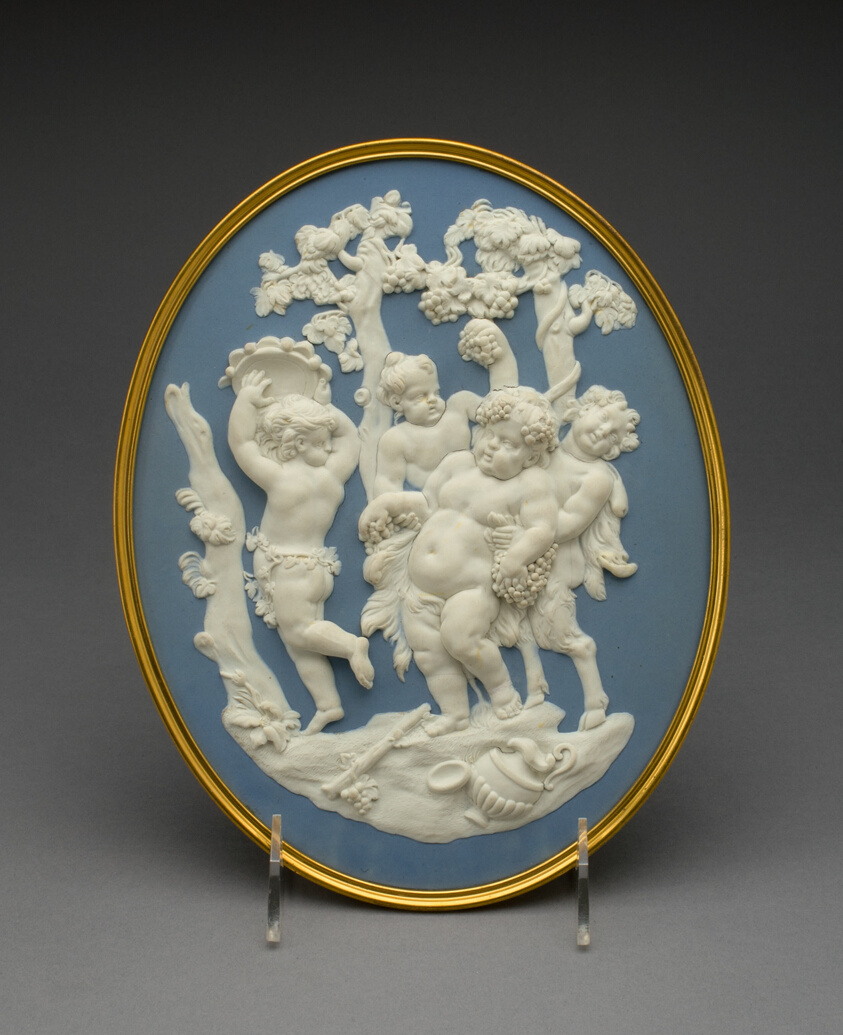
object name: Ceramics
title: Plaque with Bacchus, Fauns, and Silenus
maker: Wedgwood Manufactory (England, founded 1759)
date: 1769/80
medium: Stoneware (jasperware)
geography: Burslem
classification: sculpture; stoneware; european decorative arts; ceramics